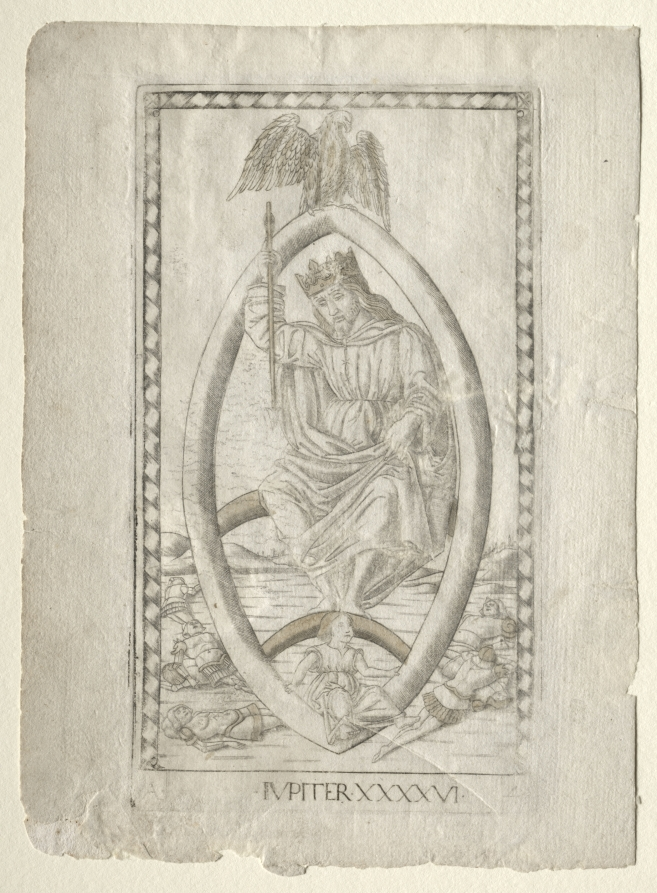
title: Jupiter (from the Tarocchi, series A: Firmaments of the Universe, #46)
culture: Italy, Ferrara, 15th century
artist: Master of the E-Series Tarocchi (Italian, active 1460s)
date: before 1467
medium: engraving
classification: Print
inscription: Lettered below the image of IUPITER (Jupiter): ·A· / ·IVPITER·XXXXVI· / [46]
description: This engraving is part of the Tarocchi group marked with the letter “A”, and named Firmaments of the Universe. This series comprises the seven planets from the classical astronomy (Moon, Mercury, Venus, Sun, Mars, Jupiter, Saturn) and the three celestial spheres that separate them from the Supreme Entity (Prima Causa) from which everything was originated. Here, Iupiter (Jupiter) is personified as a full-length crowned male figure, turned to left. He is seated on a double rainbow and framed by a mandorla with an eagle at the top and a child at the bottom. Dead soldiers appear in the imaginary landscape surrounding Jupiter.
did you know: The mandorla framing Mars recalls depictions of Christ in majesty in portals of Romanesque cathedrals.